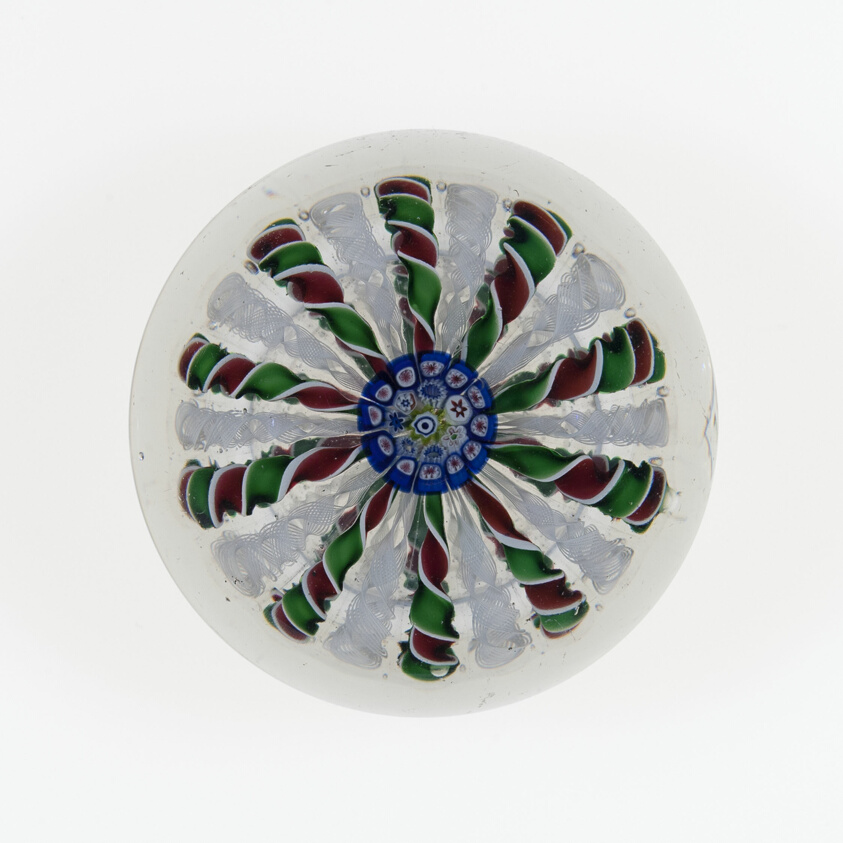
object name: Glass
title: Paperweight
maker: Saint-Louis Glassworks (Cristalleries de Saint-Louis); Lorraine, France, founded 1586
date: c. 1845–55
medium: Glass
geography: Saint-Louis-lès-Bitche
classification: paperweight; lampwork; european decorative arts; glass